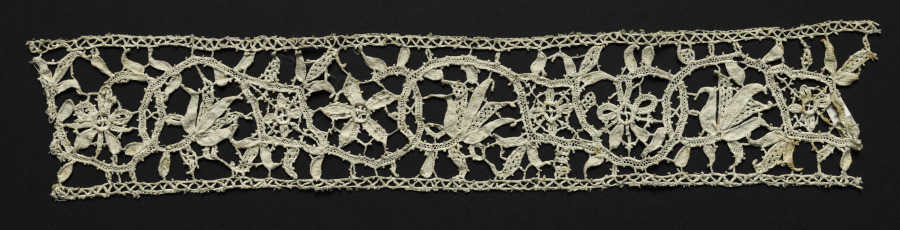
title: Lace Fragment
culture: Italy, Venice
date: 1500s–1600s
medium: Needle lace (punto in aria) insertion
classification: Lace